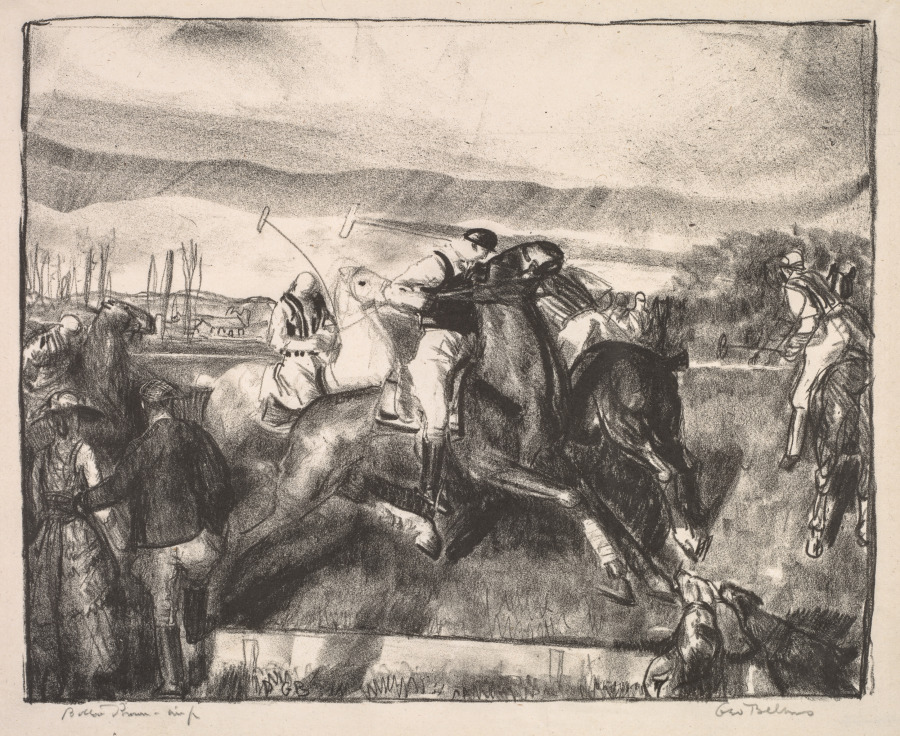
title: Polo Sketch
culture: America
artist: George Bellows (American, 1882–1925)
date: 1921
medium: lithograph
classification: Print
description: After witnessing his first polo match, Bellows described his fascination in a letter to his former English professor at Ohio State University: “I’ve been making studies of the wealthy game polo played by the ultra rich. And let me say these ultra rich have nerve tucked under their vest pocket. It’s an Aladdin’s lamp sort of game. You wish to be a hundred yards to your left, you kick your heels—and there you are. . . . The players are nice looking, moral looking. The horses are beautiful. I believe they brush their teeth and bathe them in goat’s milk. It is a great subject to draw.